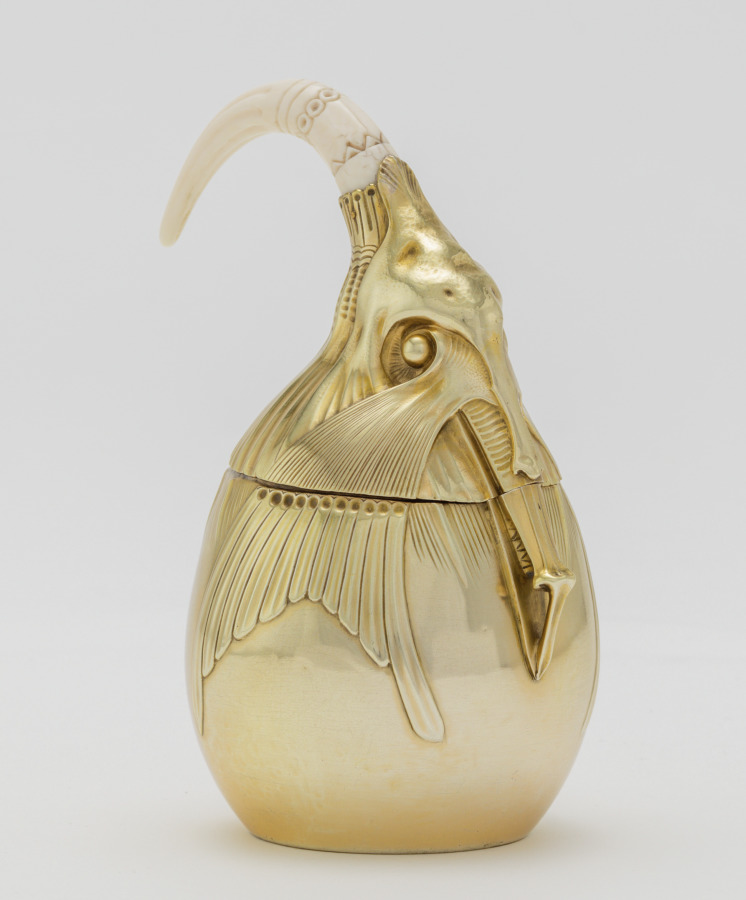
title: Covered Sugar Bowl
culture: France, Paris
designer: Carlo Bugatti (Italian, 1856–1940)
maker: Adrien-Aurélien Hebrard (French, 1866–1937)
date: c. 1907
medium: Gilt silver and ivory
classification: Silver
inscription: Made by A. A. Hebrard Firm, Paris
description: This tea and coffee service, salver, and table, together with some now missing cups, were all designed by Carlo Bugatti as an ensemble and presented at the 1902 exposition devoted to decorative arts in Turin, Italy. The set was probably acquired from Bugatti's 1907 exhibition at the Galerie Hébrard in Paris by a wealthy South African widow, Anna Blake, who was living there at the time. Some of the animal and insect motifs suggest mythical beasts or the fossils of prehistoric animals. When Mrs. Blake returned to Cape Town, she took these and other pieces designed by Bugatti with her, and they remained in South Africa throughout her lifetime.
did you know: This covered sugar bowl is part of a larger tea and coffee service designed by Carlo Bugatti.